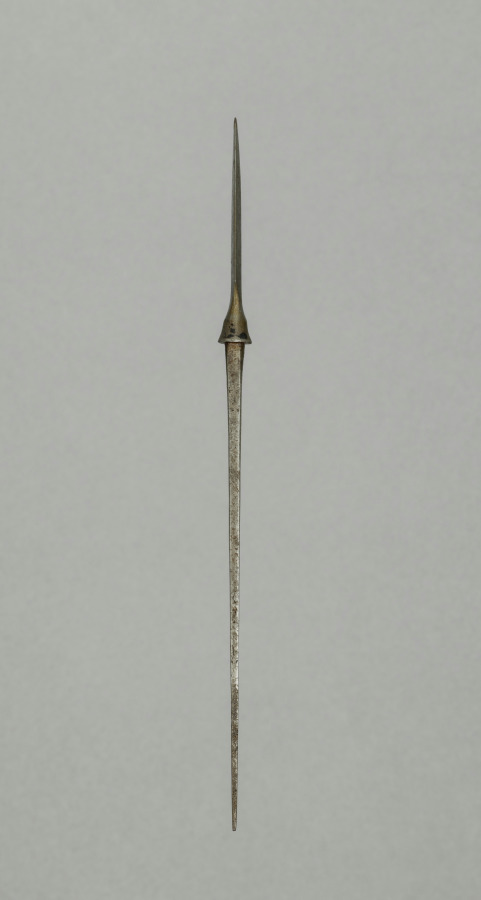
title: Arrow Point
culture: Japan, Edo period (1615–1868)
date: 1700s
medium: steel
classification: Arms and Armor